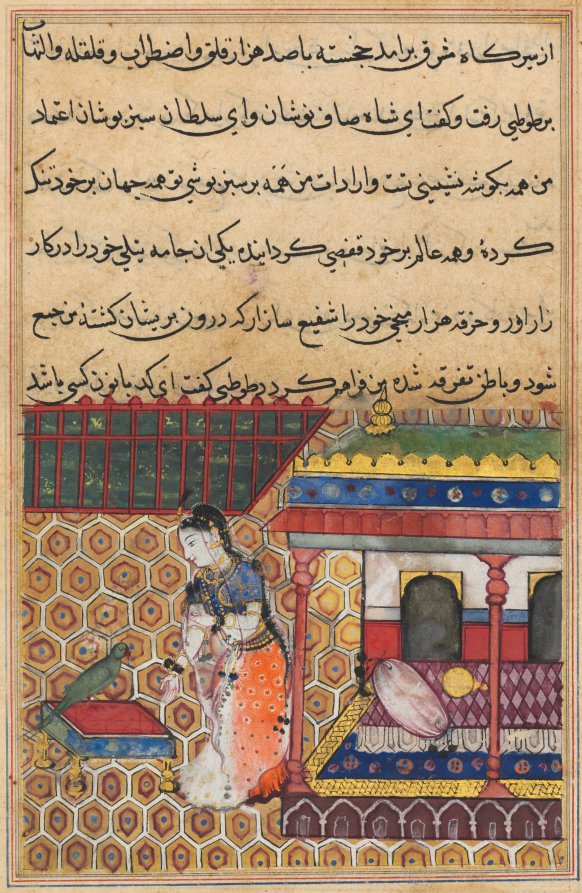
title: The parrot addresses Khujasta at the beginning of the thirty-eighth night, from a Tuti-nama (Tales of a Parrot)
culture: Mughal India, court of Akbar (reigned 1556–1605)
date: c. 1560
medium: gum tempera, ink, and gold on paper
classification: Painting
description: Before Khujasta can leave for a clandestine meeting with her lover, she is stopped by Tuti the parrot who begins to tell her the story of a group of small animals who joined together to overcome an elephant. By the time the parrot’s tale is over, the sun has risen and Khujasta is unable to leave.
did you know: A golden mirror lies on Khujasta’s bed.